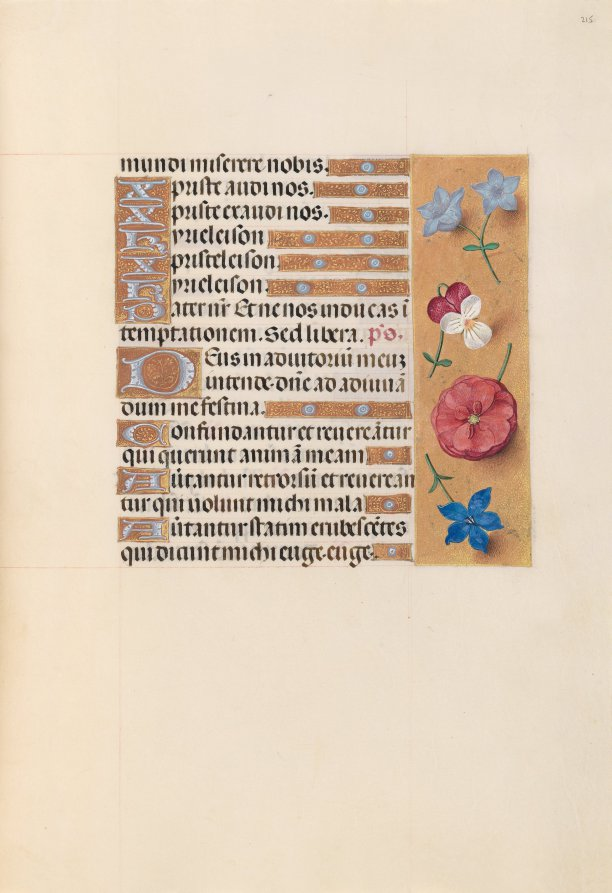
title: Hours of Queen Isabella the Catholic, Queen of Spain: Fol. 215r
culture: Flanders, Ghent and Bruges, late 15th century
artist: Master of the First Prayerbook of Maximillian (Flemish, c. 1444–1519)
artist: and Associates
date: c. 1500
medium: ink, tempera, and gold on vellum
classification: Bound Volume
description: This manuscript was illuminated by a circle of at least five highly organized manuscript painters active in the Flemish cities of Ghent and Bruges. The principal illuminator was Alexander Bening, who painted the majority of the book's miniatures. Manuscripts produced by this circle of artists are renowned for the decoration of their borders, which typically feature a rich variety of realistically-painted flowers, birds, and butterflies. This prayer book, called a book of hours, was intended not for a cleric, but for the private devotions of a lay person-in this case, Isabella the Catholic, Queen of Spain (1451-1504). Isabella's coat of arms embellishes the book's frontispiece. It is unlikely that the book was commissioned by the Queen herself; rather, she probably received it as a diplomatic gift from someone courting her patronage, perhaps Cardinal Francisco Jimenez de Cisneros. A Franciscan friar, Jimenez was dependent upon Isabella for his advancement, first to the post of Queen's confessor in 1492, and then to Archbishop of Toledo in 1495.